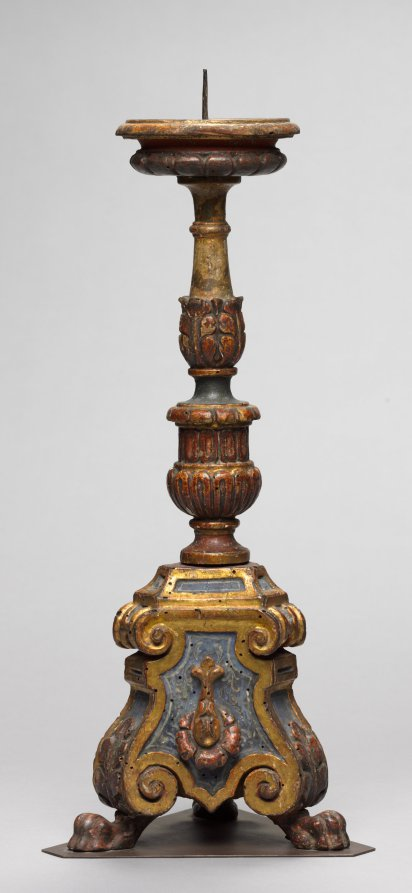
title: Candlestick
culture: Italy, probably Tuscany, late 15th century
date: late 1400s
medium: carved and gilded wood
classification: Furniture and woodwork